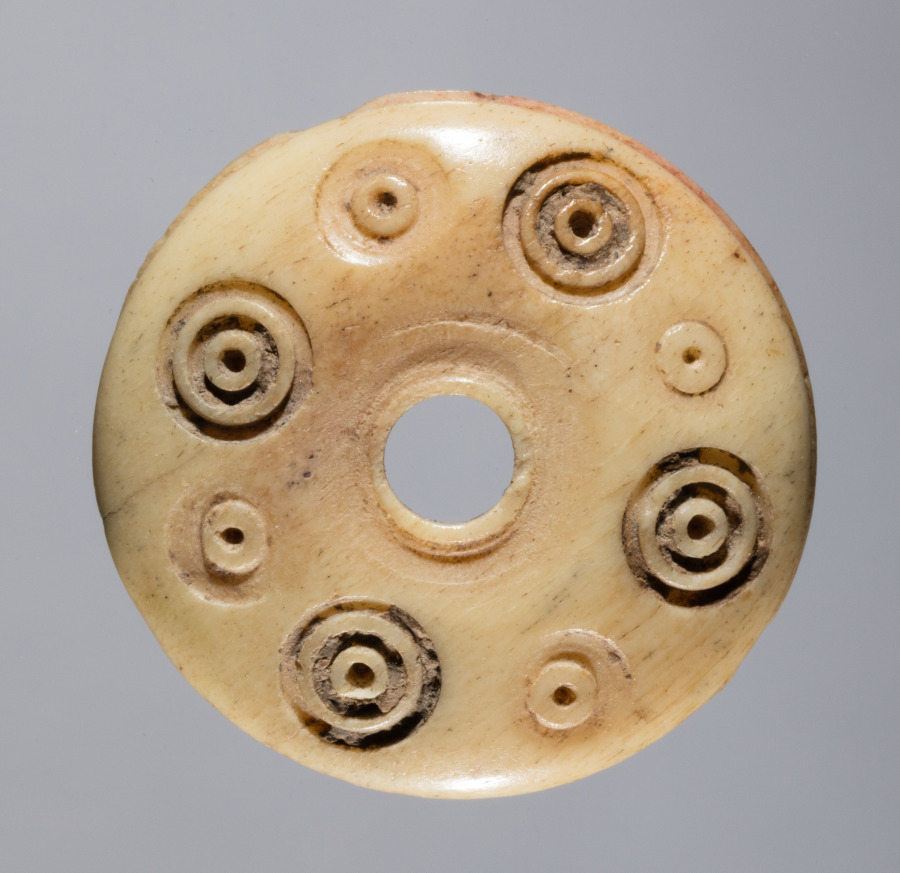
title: Spindle Whorl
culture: Iran, early Islamic period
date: 700s - 900s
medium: bone, incised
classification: Spindle Whorl